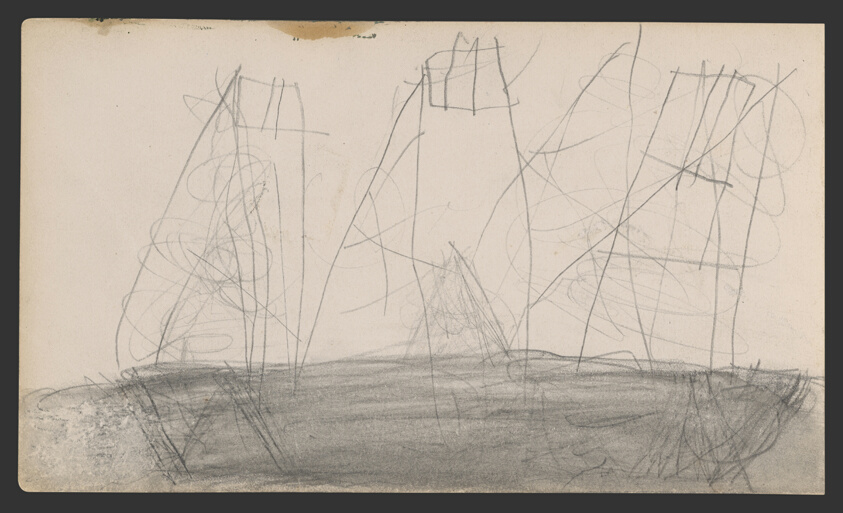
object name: Drawing and Watercolor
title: Sketchbook No. 2 (L'Estaque)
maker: Paul Cézanne; French, 1839-1906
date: 1875–86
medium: Graphite and pen and ink drawings on paper, bound into a book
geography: France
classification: sketchbook; graphite; prints and drawing; paper